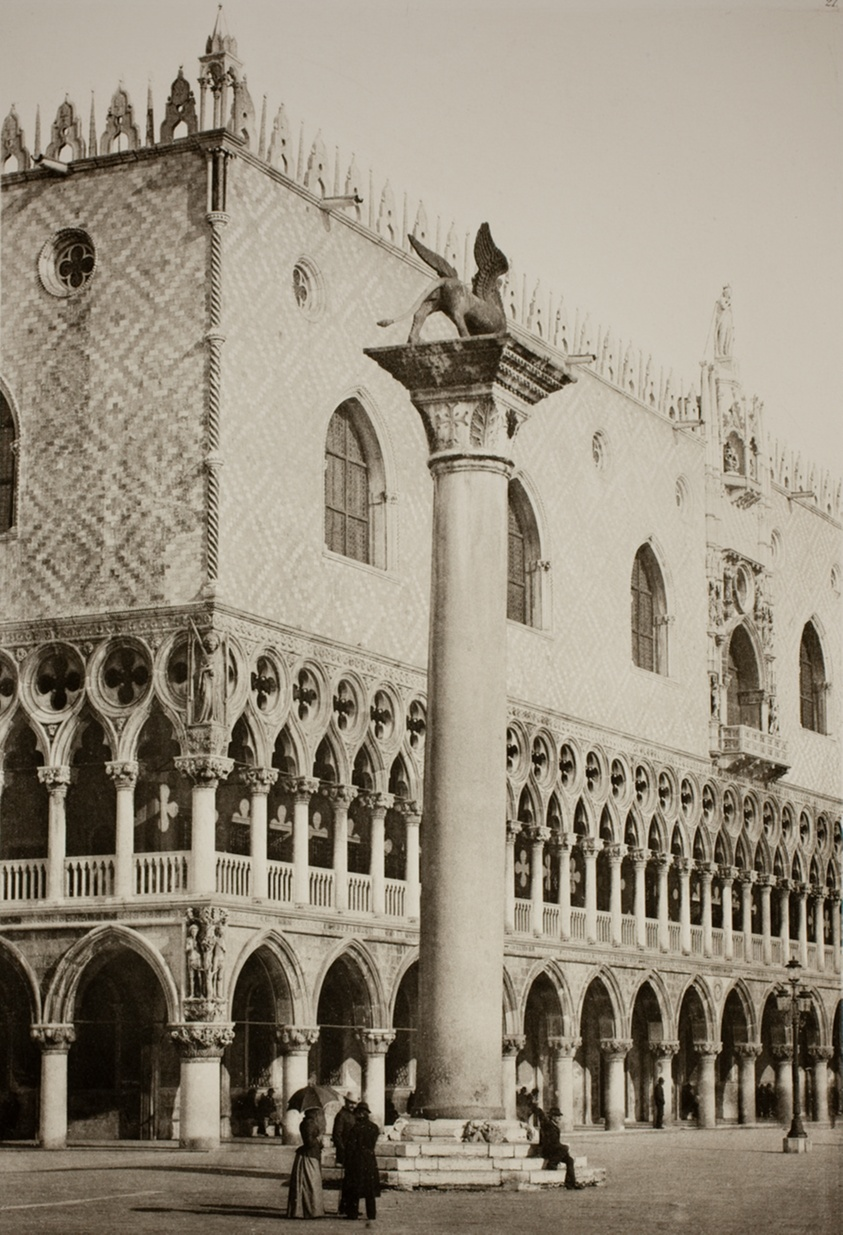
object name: Photograph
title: Untitled (27)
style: 19th century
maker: edited by Ferdinando Ongania; Italian, 1842–1911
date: c. 1890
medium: Photogravure, No. 27 from the portfolio "Calli, Canali e Isole della Laguna"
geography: Italy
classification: photograph; photography